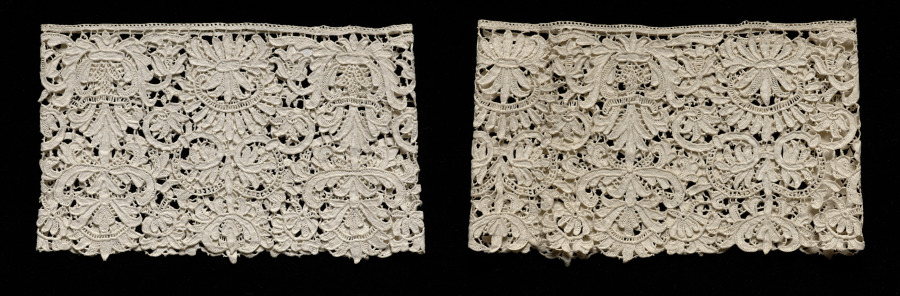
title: Pair of Lace Cuffs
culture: Italy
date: 1600–1640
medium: Needle lace (punto in aria)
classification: Lace